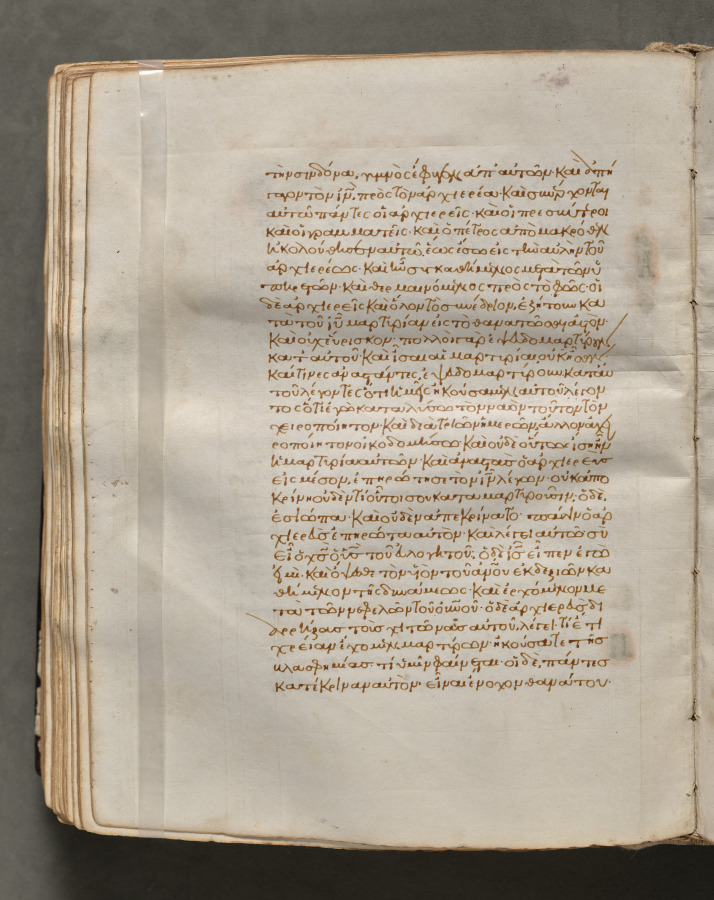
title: Text, folio 191 (verso), from a Gospel Book with Commentaries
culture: Byzantium, Constantinople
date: c. 1000–1100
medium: ink, tempera, and gold on vellum; leather binding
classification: Bound Volume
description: Each of the four gospels in this book opens on a page with brilliantly illuminated borders depicting the author of the text as well as birds-principally peacocks, symbols of the immortality of the soul-and fountains, representing the fountain of life and the salvation of the soul. This volume consists of 428 leaves with texts in Greek. Its level of sophistication suggests that it was probably written and decorated in a monastery in Constantinople.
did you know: Gospel Books were carried in procession through Byzantine churches.